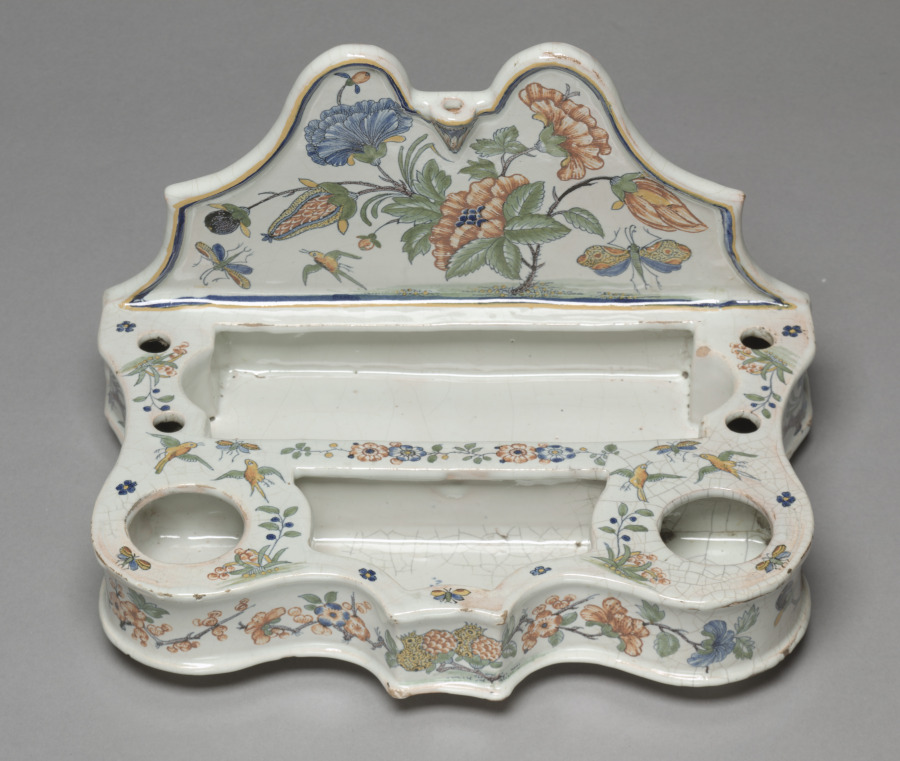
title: Writing Stand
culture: France, Sinceny, 18th century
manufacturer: Sinceny Factory (French)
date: 1746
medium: Tin-glazed earthenware (faience) with enamel decoration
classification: Ceramic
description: The faience factory at Sinceny was an offshoot of that at Rouen. In style, Sinceny closely resembles later Rouen wares with polychrome decoration. The stylized flowers and insects which decorate this writing stand are entirely typical of Sinceny faience.